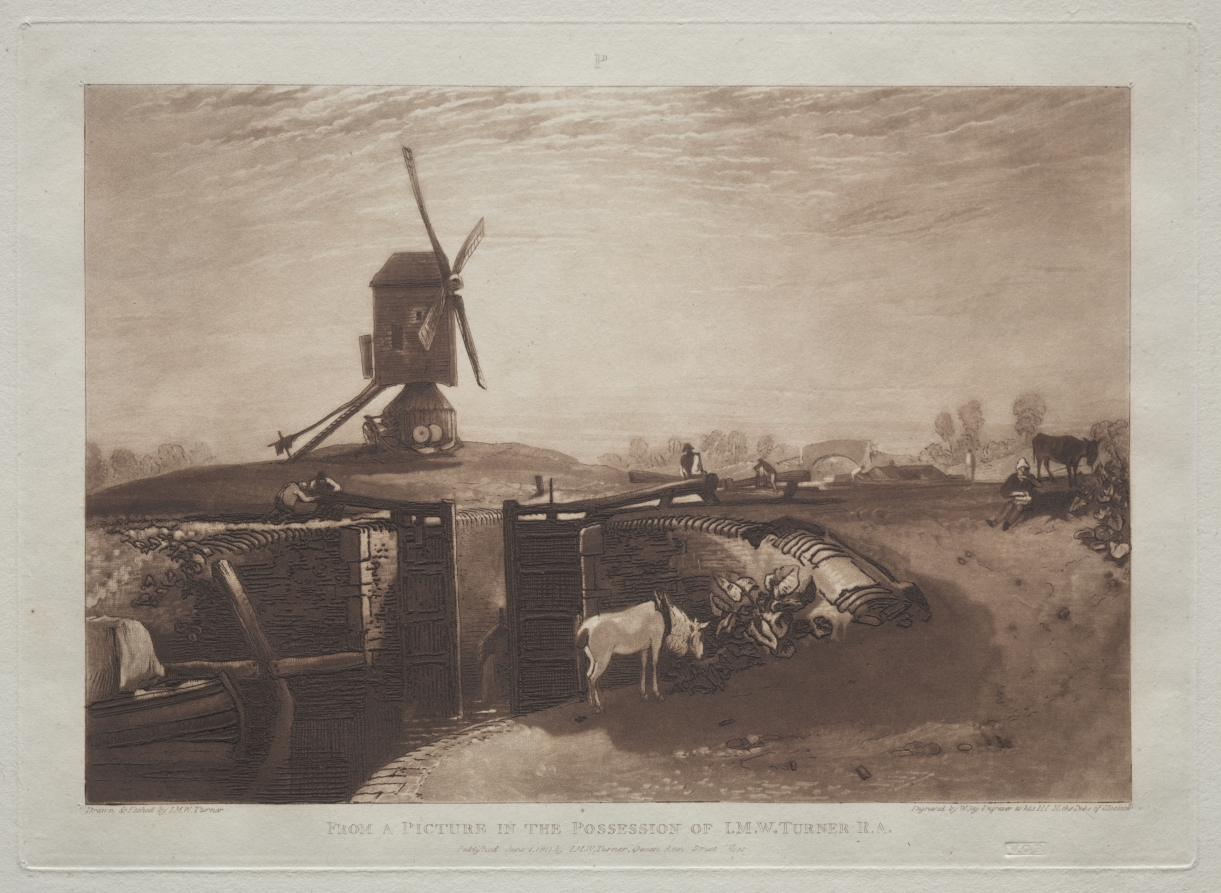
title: Liber Studiorum: Windmill and Lock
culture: England, 19th century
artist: Joseph Mallord William Turner (British, 1775–1851)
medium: etching and mezzotint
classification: Print